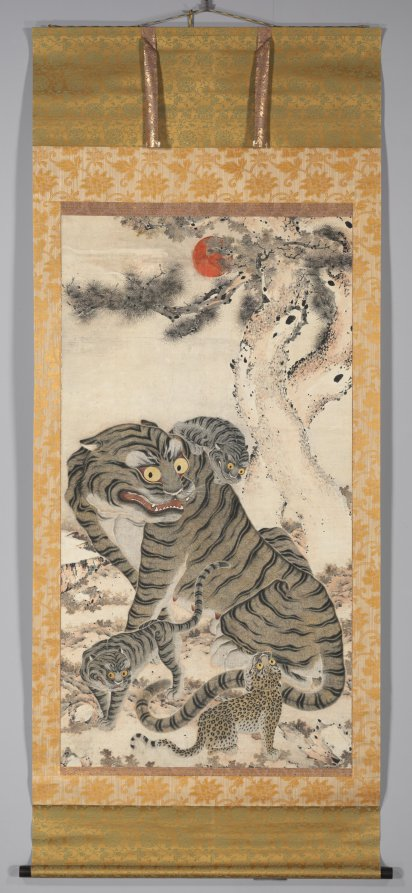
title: Tiger Family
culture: Korea, Joseon dynasty (1392–1910)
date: late 1800s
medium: hanging scroll; ink and color on paper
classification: Painting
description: In deep mountains, a tigress, two cubs, and a leopard welcome the early morning sun. This is not merely a playful scene but a well calculated image with symbols of longevity (pine trees), prosperity (tigress and cubs), and good fortune (leopard). Traditionally, on New Year’s Eve, the image of a fearsome-looking tiger was pasted on entrance doors to ward off evil spirits. Conventional Korean tiger paintings often include frolicking magpies, but here, the crimson sun is placed behind a majestic pine. Through the sunrise and the details of the felines’ skin shines the artist’s keen interest in creating a realistic atmosphere.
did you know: A great number of tigers used to have live in the Korean peninsula. An old Chinese proverb says: “Korean people hunt tigers half of the year, and tigers hunt people other half of the year.”